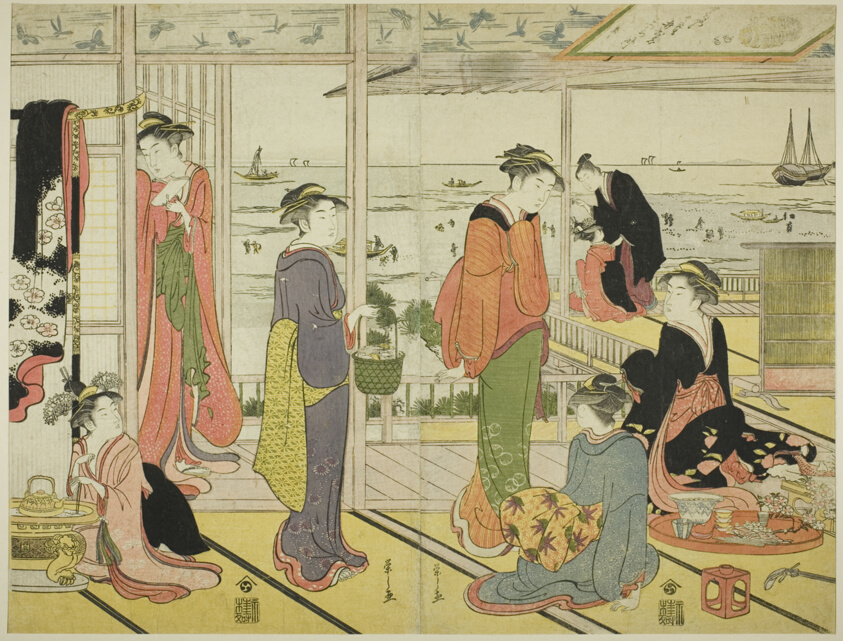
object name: Print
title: In a Pleasure House in Shinagawa (Shinagawa no rojo)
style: Japanese (culture or style)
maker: Chobunsai Eishi; Japanese, 1756-1829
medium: Color woodblock prints; two sheets from an oban triptych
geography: Japan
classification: woodblock print; print; asian art